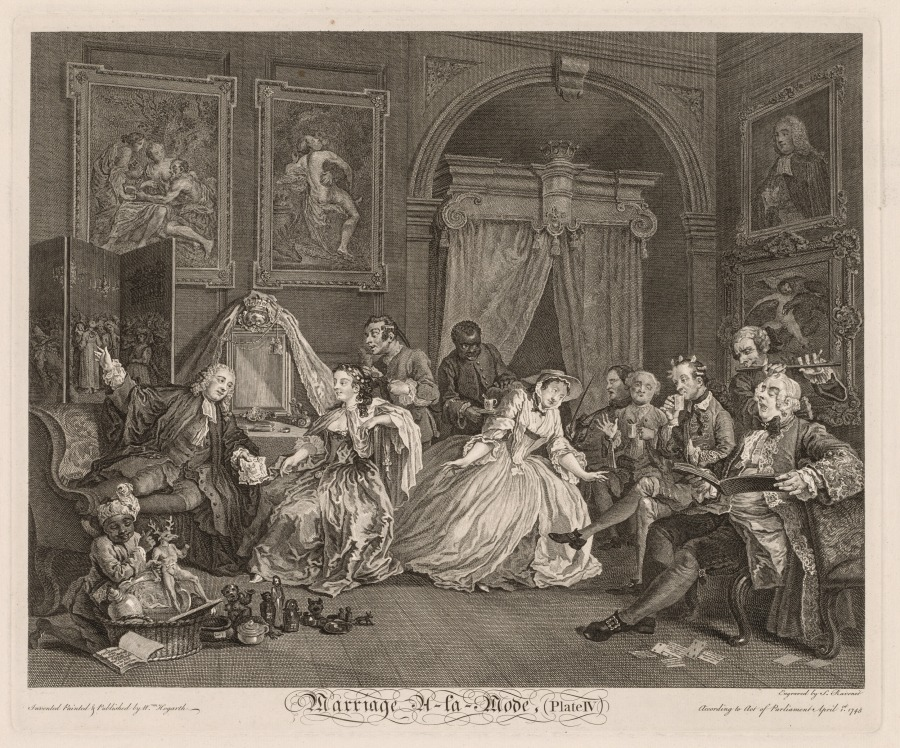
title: Marriage à la Mode: The Toilet Scene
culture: England, 18th century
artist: William Hogarth (British, 1697–1764)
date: 1745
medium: engraving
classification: Portfolio